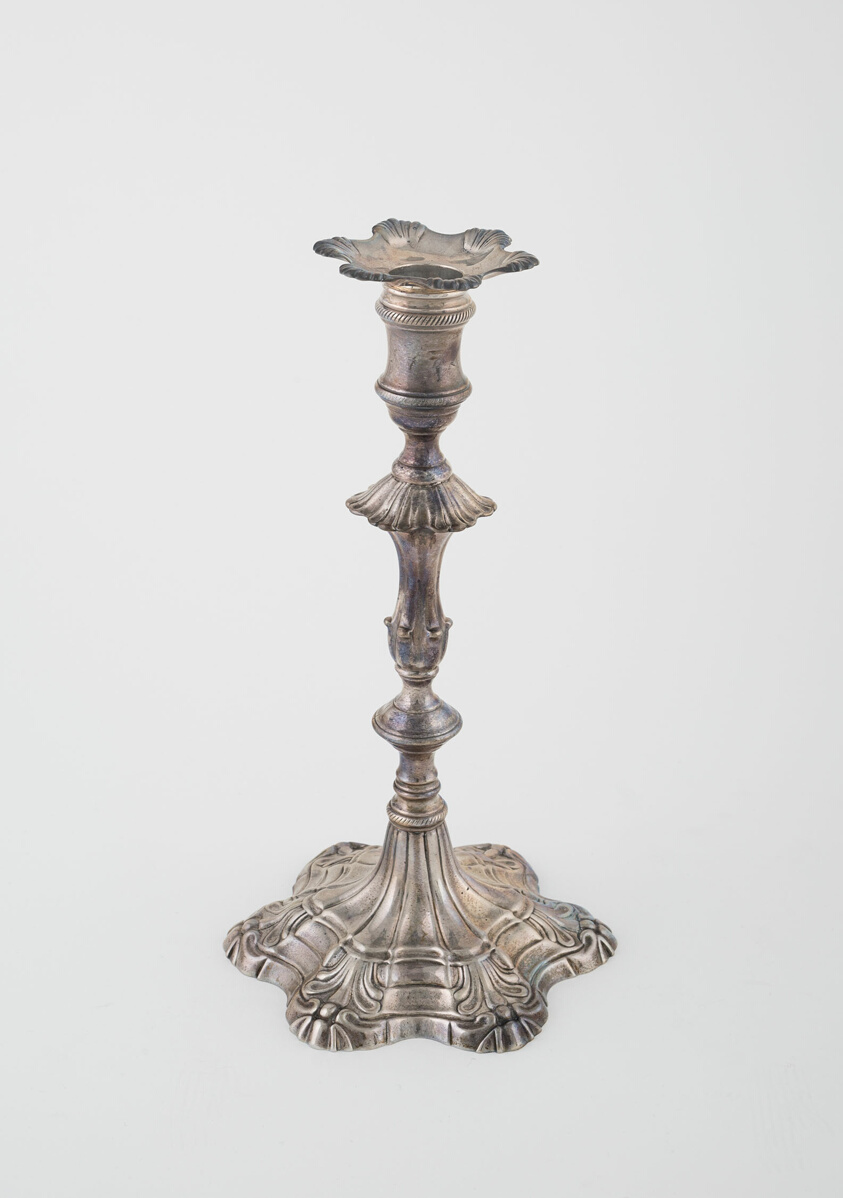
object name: Metalwork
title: Candlestick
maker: Probably Ebenezer Coker; English, 1738-1783; London, England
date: 1762/63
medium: Silver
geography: London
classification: candleholder - candlestick; candleholder; silver; metalwork; european decorative arts